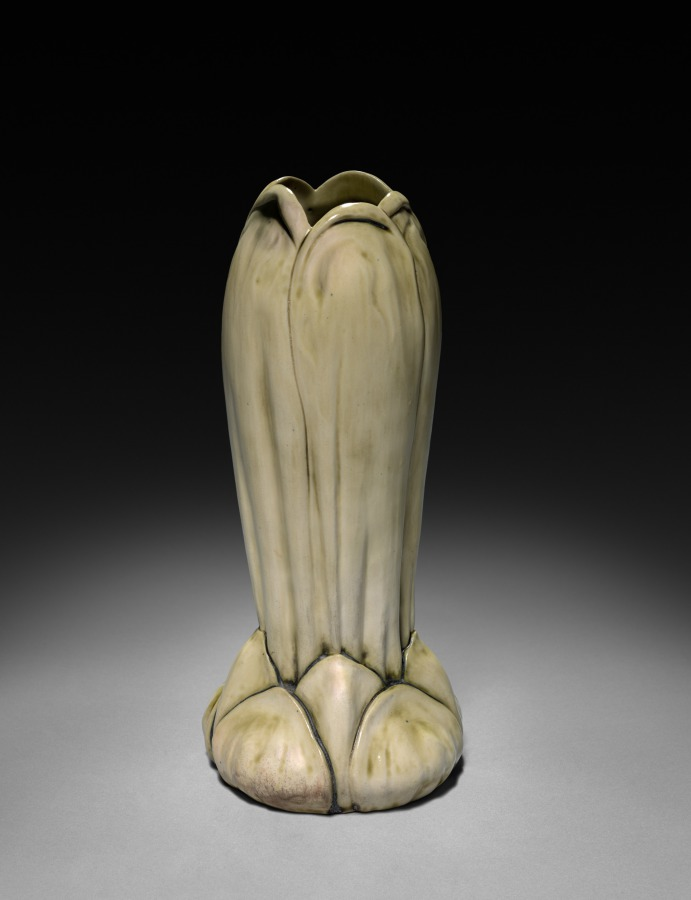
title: Artichoke Vase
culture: America, New York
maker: Tiffany Studios (United States, New York, 1902–32)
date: c. 1905–10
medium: Glazed white clay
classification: Ceramic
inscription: engraved on underside: LCT 7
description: By 1900 Louis Comfort Tiffany had expanded his empire by increasing the firm’s production of “fancy goods,” including inkstands, candlesticks, clocks, small boxes, desk sets, tea screens, and other functional objects. Along with the array of artistic glass designs from his factory in Corona, Queens, works in ceramic, bronze, other metals, and even jewelry abounded. These affordable luxury items were designed with as much thought to artistry as the great stained glass windows and lamps through which the firm enjoyed unrivaled success.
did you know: Ceramic works were Louis Comfort Tiffany's contribution to the art pottery movement of the early 1900s.